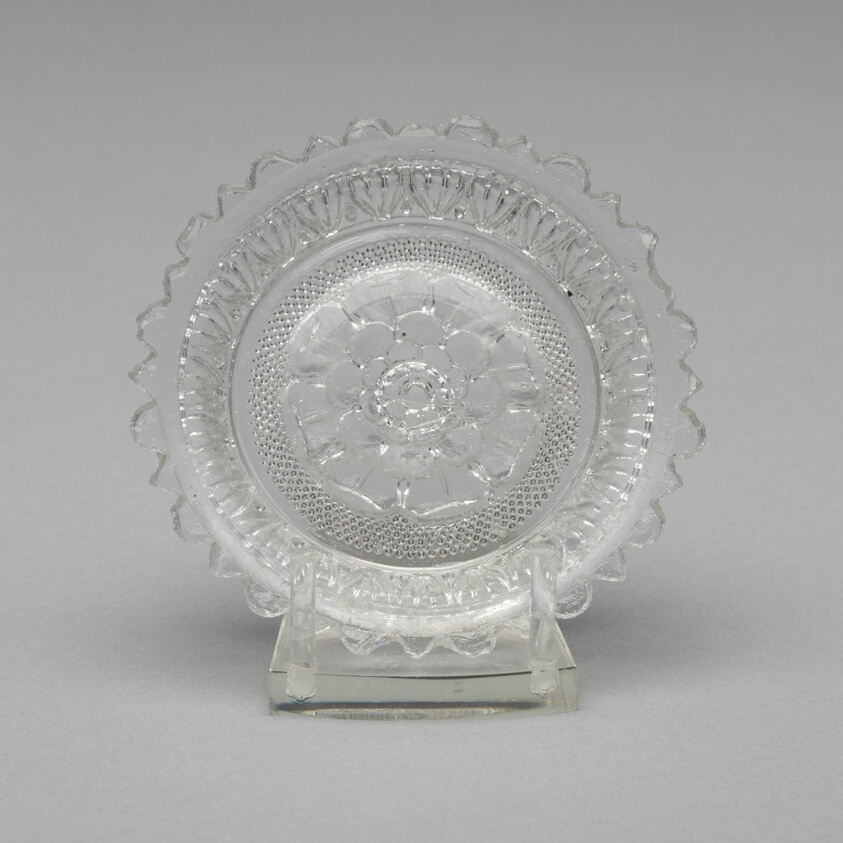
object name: Glass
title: Cup plate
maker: Artist unknown (American, 19th century); Midwest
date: 1830–35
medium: Pressed glass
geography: Midwest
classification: plate (general, dish); glass; american decorative arts; american arts; decorative arts